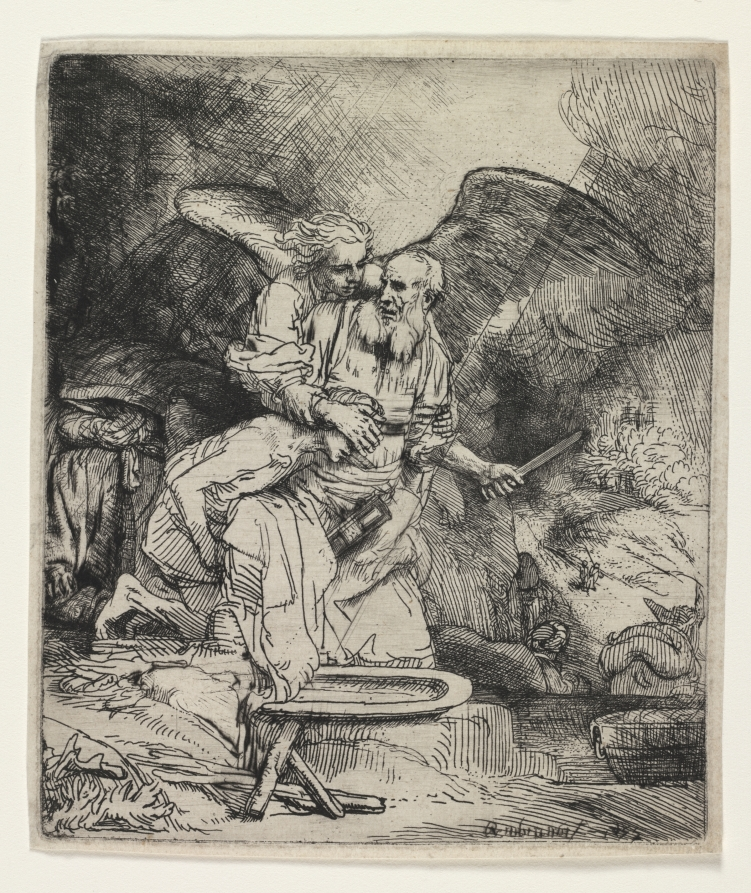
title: Abraham's Sacrifice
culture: Netherlands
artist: Rembrandt van Rijn (Dutch, 1606–1669)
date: 1655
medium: etching and drypoint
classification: Print